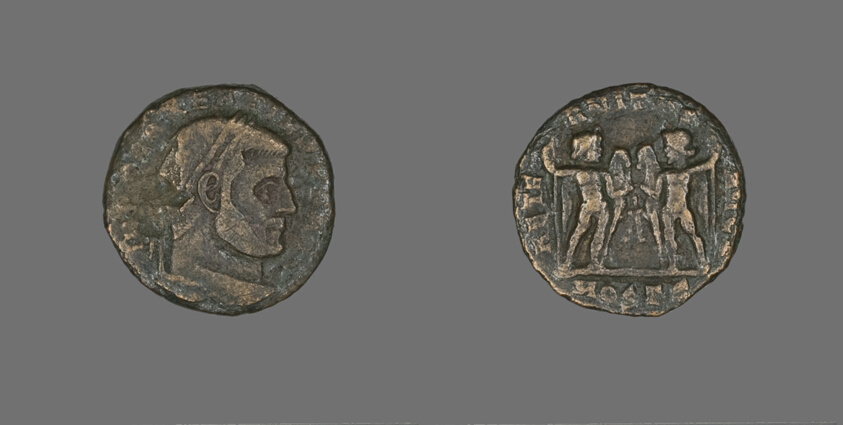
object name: Coin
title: Coin Portraying Emperor Maxentius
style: imperial (roman), ancient, roman (ancient, style or period)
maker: Roman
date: 306-312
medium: Bronze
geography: Roman Empire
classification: coin; ancient art